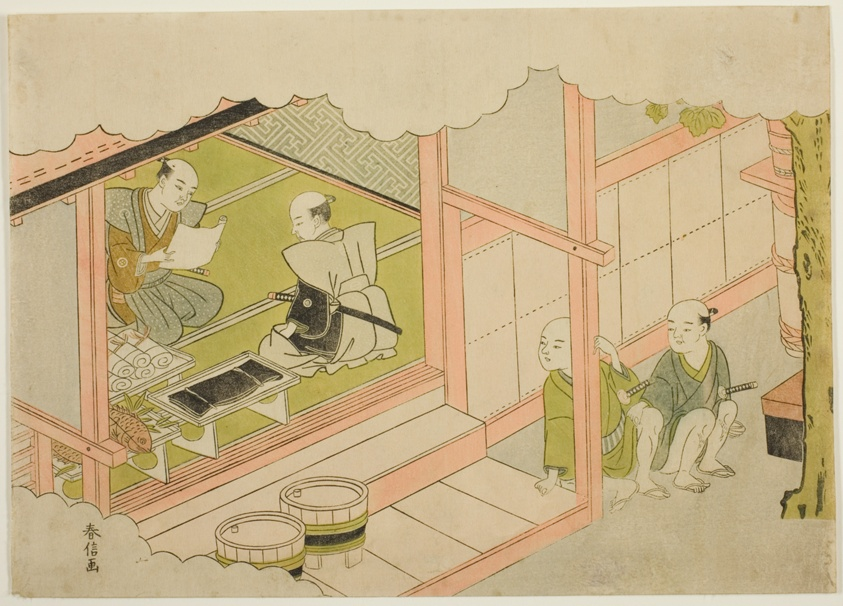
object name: Print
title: Exchange of Gifts (Yuino), the second sheet of the series "Marriage in Brocade Prints, the Carriage of the Virtuous Woman (Konrei nishiki misao-guruma)"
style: Japanese (culture or style)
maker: Suzuki Harunobu 鈴木 春信; Japanese, 1725 (?)-1770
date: c. 1769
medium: Color woodblock print; chuban yoko-e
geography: Japan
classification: woodblock print; print; asian art